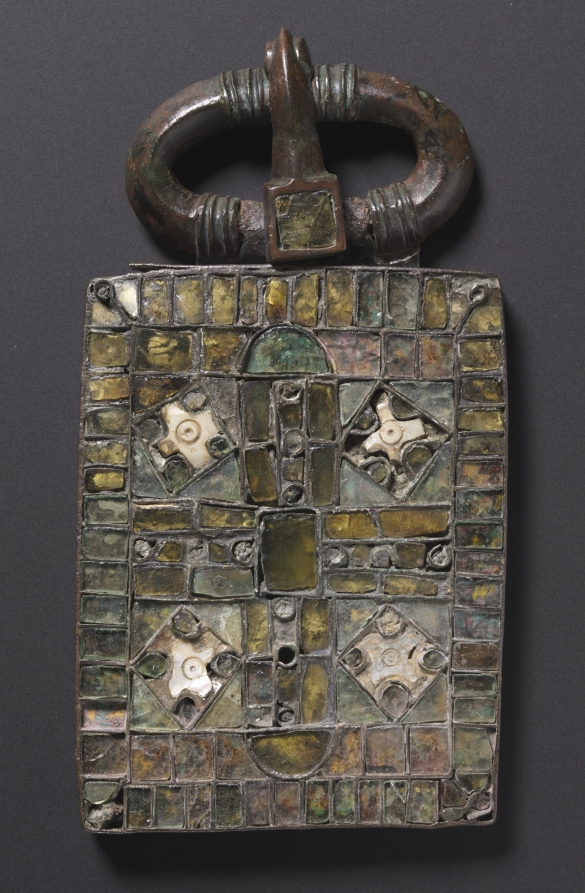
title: Belt Buckle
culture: Visigothic, Iberian Peninsula, Migration period, 6th century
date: c. 525–560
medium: bronze and glass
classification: Jewelry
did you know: This belt buckle is decorated with colored glass that forms a shape similar to a cross.